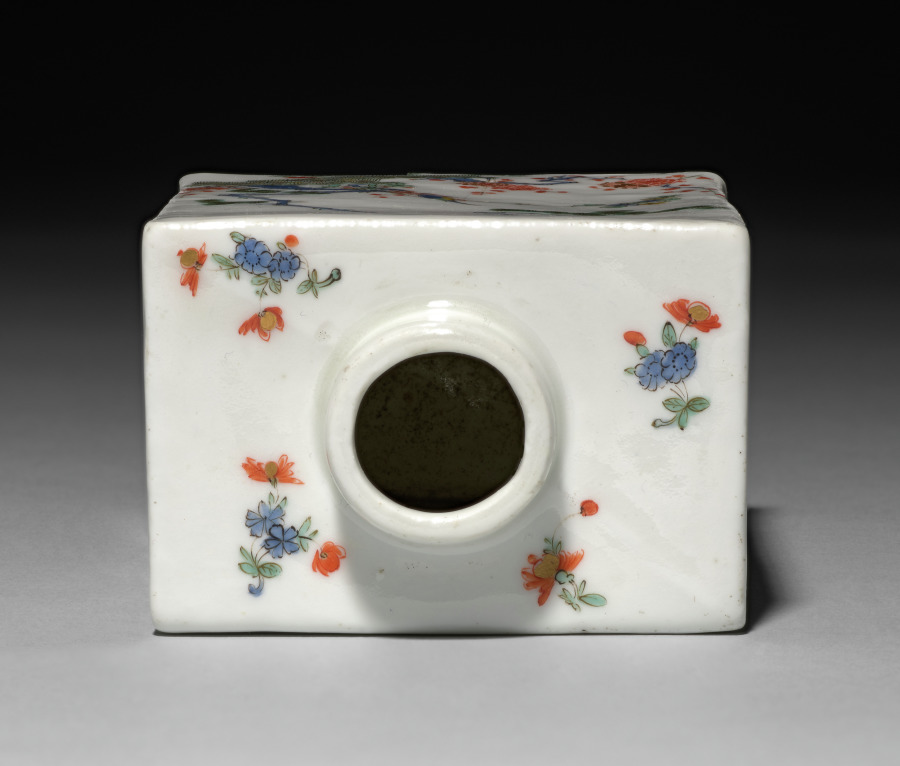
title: Tea Caddy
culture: Germany, Meissen, 18th century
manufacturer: Meissen Porcelain Factory (German, est. c. 1710)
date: c. 1735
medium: porcelain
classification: Ceramic